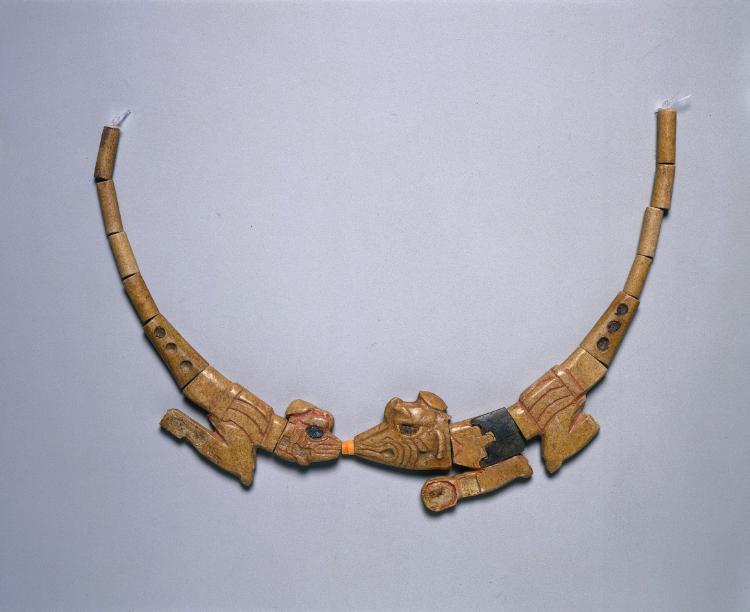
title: Necklace with Lizards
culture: Peru, Moche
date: 550–800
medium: stone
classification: Jewelry